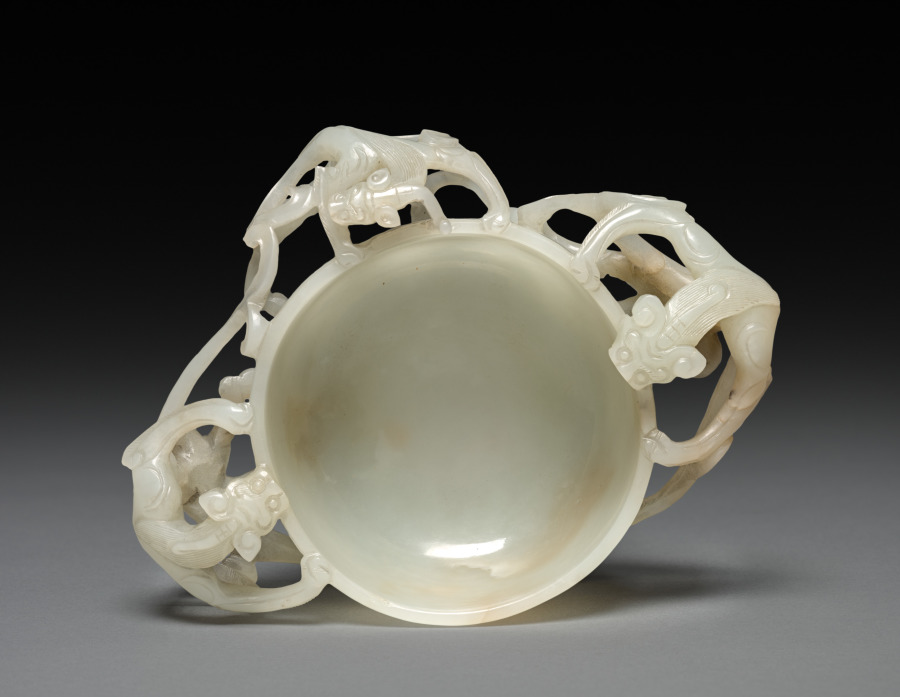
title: Cup with Dragon Handles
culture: China, Qing dynasty (1644-1911), Kangxi reign (1662-1722)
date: 1662–1722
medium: Pale gray-green white jade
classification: Jade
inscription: 萬壽長春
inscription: 壽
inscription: 子剛造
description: Three dragons, auspicious symbols for good fortune, grasp the rim of this bowl. A large shou (longevity) character is visible on the outside wall. Drinking cups with dragon handles were elite luxuries. The yellowish-white color and refined techniques are characteristic of Suzhou workshops that served the court, scholar-officials, and the merchant class. The optimistic attribution to Lu Zigang (late 1500s), a jade master recorded to have been active in Suzhou, suggests that its maker used the master’s name to attract wealthy clients eager to demonstrate their refined taste and connoisseurship.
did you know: Auspicious inscriptions on the base and front of the jade cup convey wishes for longevity.